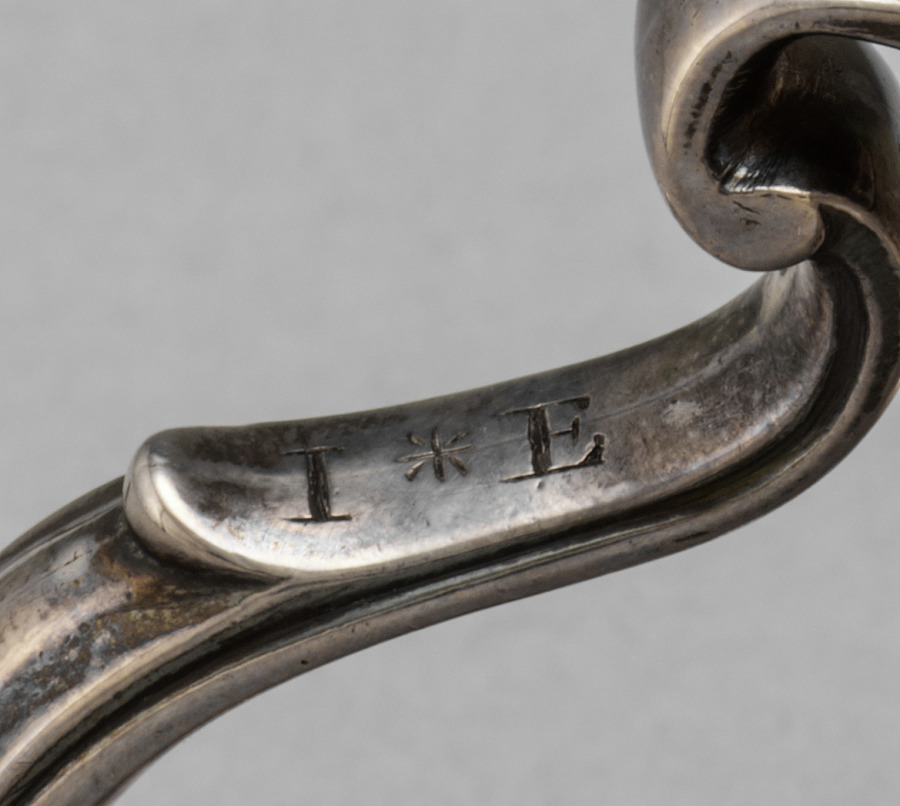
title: Gravy Boat (2 of 2)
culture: England, 18th century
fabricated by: Samuel Wood (British)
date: 1746–1747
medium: silver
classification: Silver